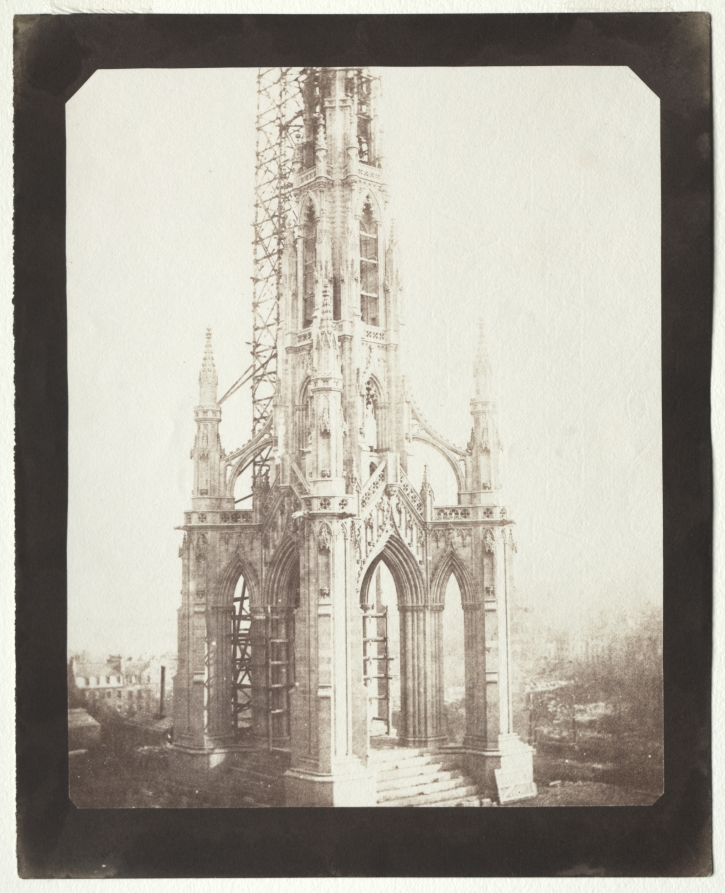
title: Scott Monument Under Construction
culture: England, 19th century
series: Sun Pictures in Scotland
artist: William Henry Fox Talbot (British, 1800–1877)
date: 1844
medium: salted paper print from calotype negative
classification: Photograph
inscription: Written in black ink on verso: "LA 26"; in pencil: "P.17"